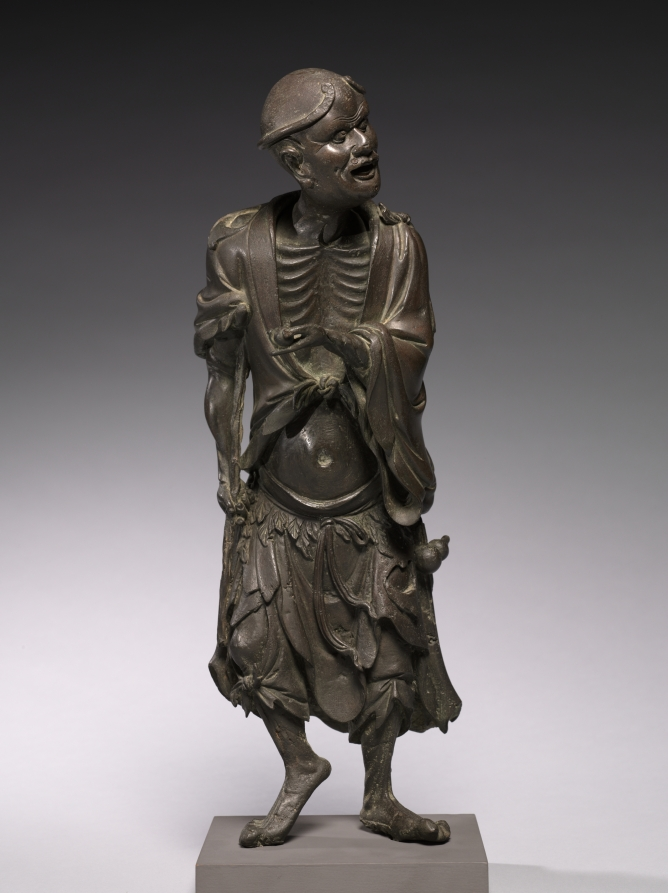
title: The Immortal Li Tieguai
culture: China, Ming dynasty (1368–1644)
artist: Su Wennan (Chinese)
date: 1500s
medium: bronze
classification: Sculpture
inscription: 蘇文南製 (Su Wennan Zhi )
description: This bronze statue of Li Tieguai shows him dressed as a beggar in a tattered robe, holding a crutch in his right and a ball of medicine in his left hand. Li Tieguai is the patron saint for physicians and legend says that he dispenses pills from the gourd for the sick. He wears a belt of leaves and another gourd hangs from his waist. His head is crowned with what appears to be a metal ring, signifying his immortal status. Four incised characters in seal script on the back of the figure reads “made by Su Wennan (蘇文南製).”